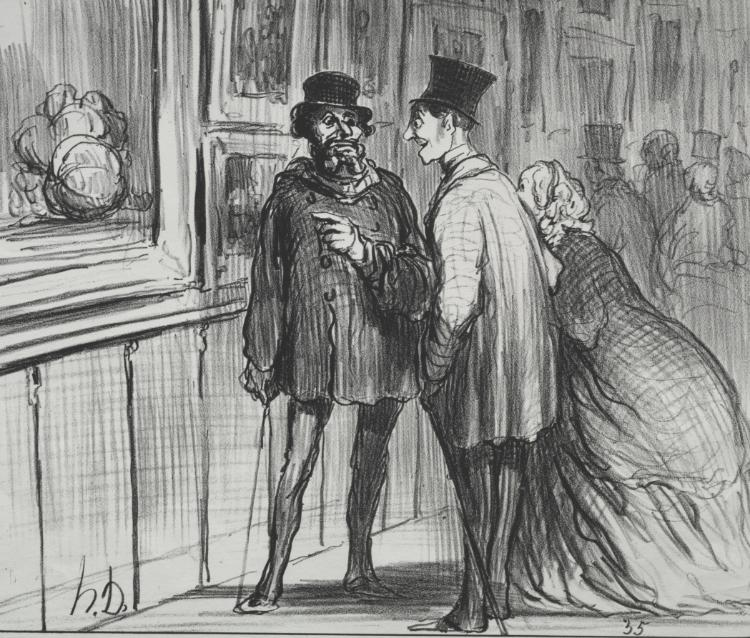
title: The Painter Who Had a Painting Refused.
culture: France, 19th century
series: The Exhibition of 1859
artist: Honoré Daumier (French, 1808–1879)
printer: Destouches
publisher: Mon. Martinet, r. Rivoli, et 41 r. Vivienne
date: 1859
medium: lithograph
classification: Print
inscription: Above image, printed:EXPOSITION DE 1859. / 8 ; Below image, printed: LE PEINTRE QUI A EU UN TABLEAU REFUSÉ. - Mossieu, ne trouvez-vous pas ce tableau horrible......, et comprenez-vouz que le jury ait accepté une pareille croûte?..... / LE MONSIEUR...- Mais , je trouve que la personne qui l'a fait a beaucoup de talent!......, c'est charmant!...... / LE PEINTRE... -Je vois que mossieu est un ami du peIntre, mossieu aura même, sans doute, posé pour ce tableau....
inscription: Lower margin, printed: Paris, maison Martinet, 172, r. Rivoli et 41, r. Vivienne / Lith. Destouches, Paris ; Around margins, in pencil: 20? LeG / v. 8 / 173 V / 8/9 / (Le G-26-210) / 1859 / H.D. 1737 / Vol. VIII / D.3141 II/II / 27 April 1859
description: This print was published in Le Charivari (April 27, 1859) as plate 8 from the series The Exhibition of 1859.